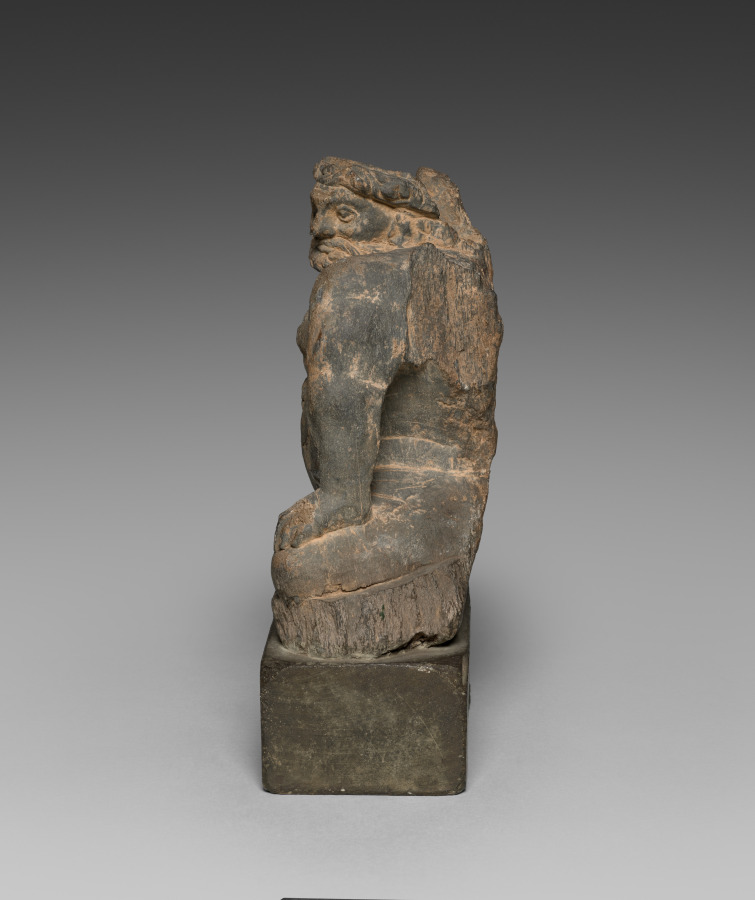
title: Winged Atlas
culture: Pakistan, Gandhara, Kushan period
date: c. 100s–200s CE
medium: gray schist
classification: Sculpture